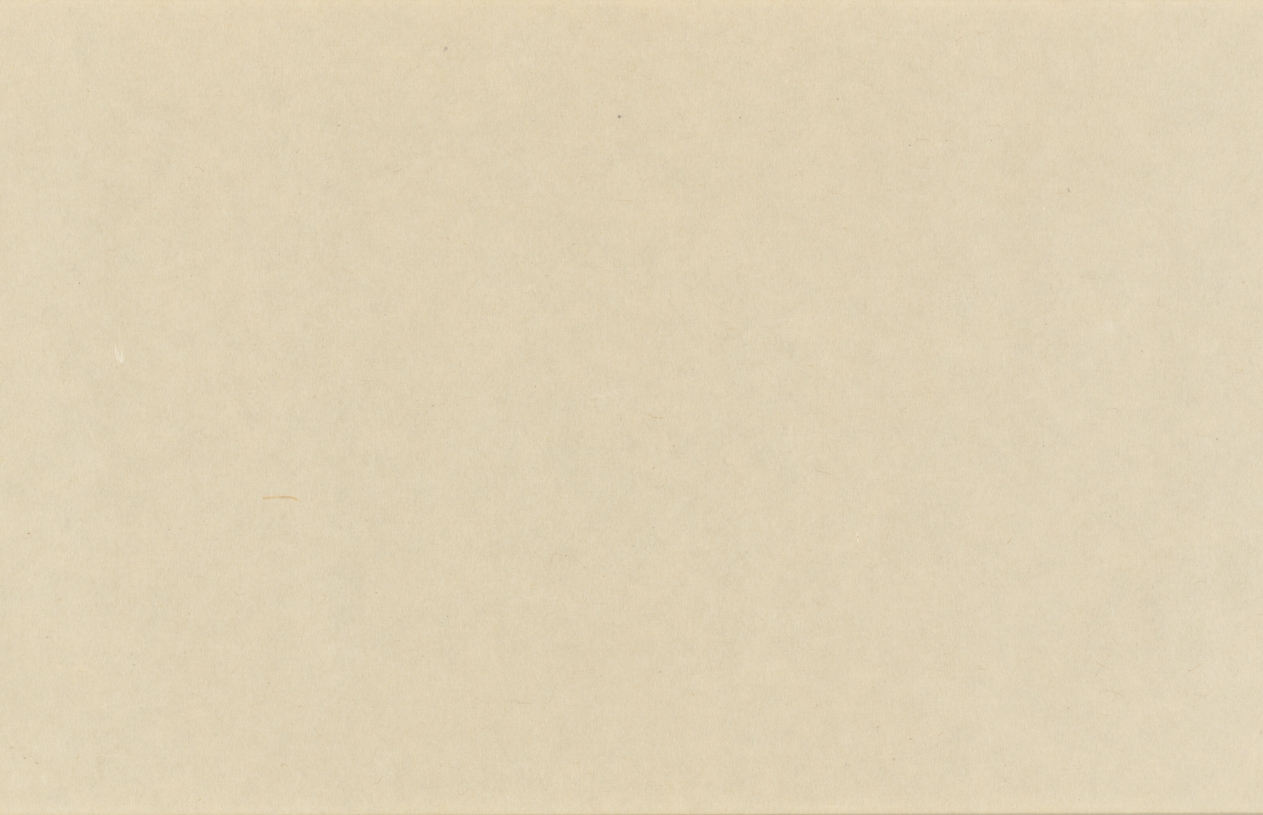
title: Eight Views of Xiao-Xiang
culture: Japan, Muromachi period (1392–1573)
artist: Sesson Shūkei (Japanese, c. 1492–c. 1577)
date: 1500s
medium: handscroll; ink on paper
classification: Painting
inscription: Signature and seal of artist at end of painting.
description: Eight Views of the Xiao and Xiang Rivers can be traced to 11th-century Chinese poems and paintings, the depiction of which had also become popular among Korean and Japanese painters. Xiao-Xiang refers to the region in present-day Hunan province where the Xiao and Xiang rivers converge. Few painters of the Eight Views had in fact seen the scenery; rather, they were trying to portray in ink and wash the lyrical qualities of dim light and a misty atmosphere typical of that region. Each of the poetic titles suggests a time of day, a season, or specific atmospheric conditions—subjects that challenged the abilities of the most talented artists. In this miniature painting (shukuzu) of the Muromachi period, Japanese Zen monk and painter Shukei Sesson depicted all eight views featured in Chinese prototypes: Wild Geese Descending to Sandbar; Returning Sails Off a Distant Coast; Mountain Market in Clearing Mist; River and Sky in Evening Snow; Autumn Moon over Dongting Lake; Night Rain on the Xiao and Xiang; Evening Bell from Mist-Shrouded Temple; and Fishing Village in Evening Glow.